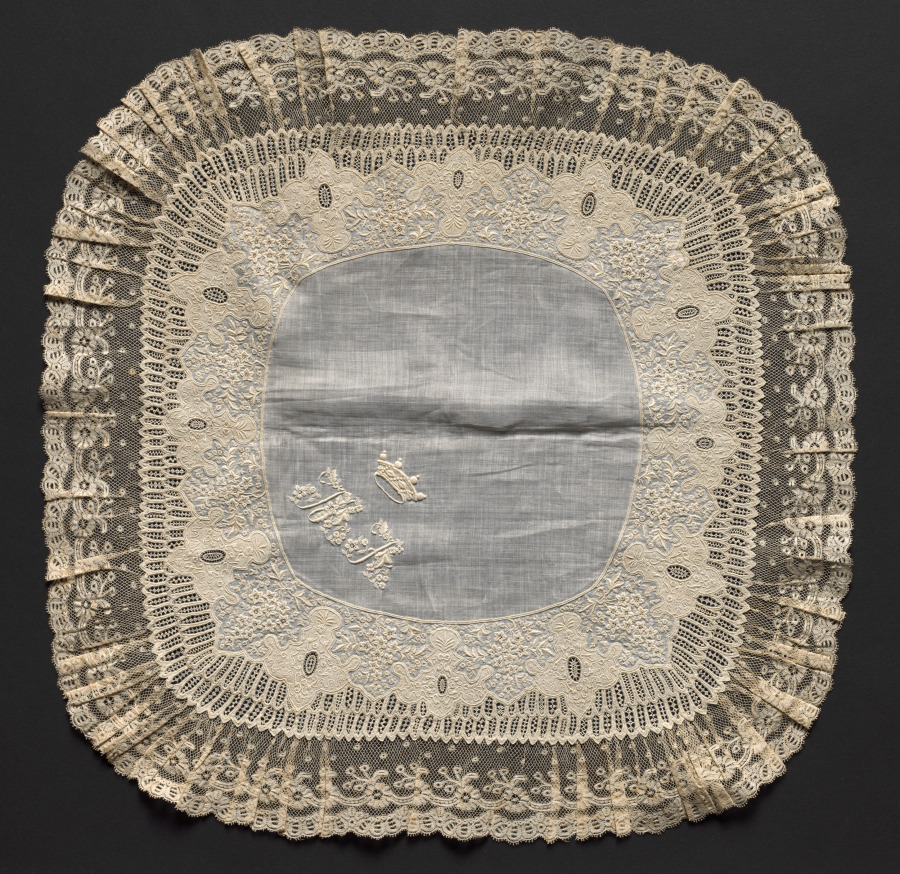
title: Lace Handkerchief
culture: Switzerland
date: 1850–99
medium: Plain weave linen center with bobbin lace (Valenciennes lace) edging and embroidery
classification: Embroidery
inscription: in one corner: "M.F." (?) with coronet above.